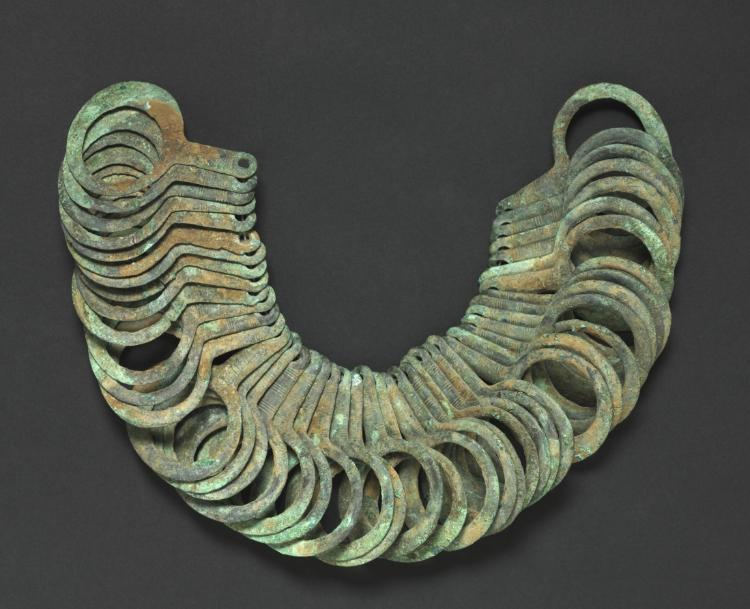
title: Bronze Necklace with Hanging Pendants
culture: Northern Greece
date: 700s BCE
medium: bronze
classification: Jewelry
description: 45 separately cast pendants overlap one another when strung together and hung, reversing course at the bottom.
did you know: The green patina of this bronze necklace is a result of the oxidation process.